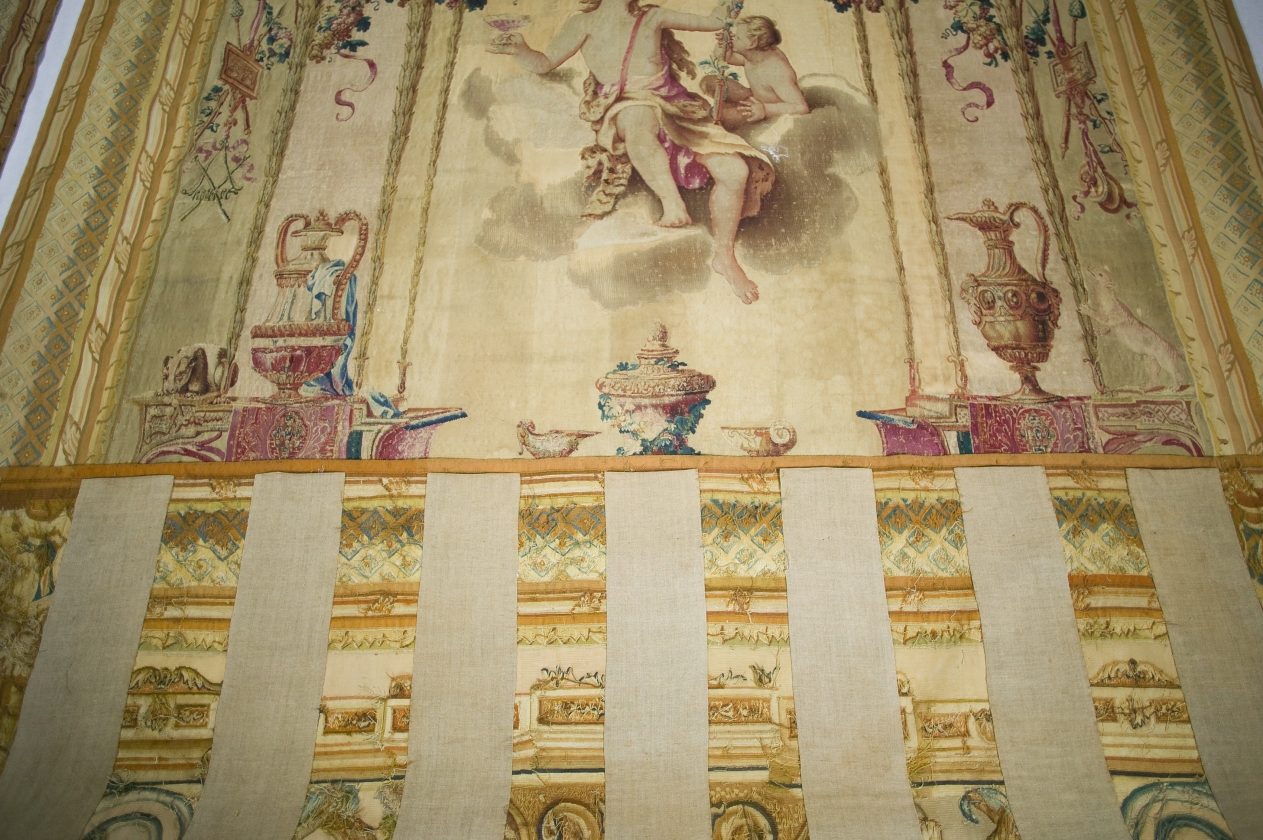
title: Seasons: Autumn, Bacchus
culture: France, 18th century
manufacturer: Gobelins Manufactory (France, Paris, est. 1662)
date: 1700s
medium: tapestry weave; silk, wool, cotton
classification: Tapestry